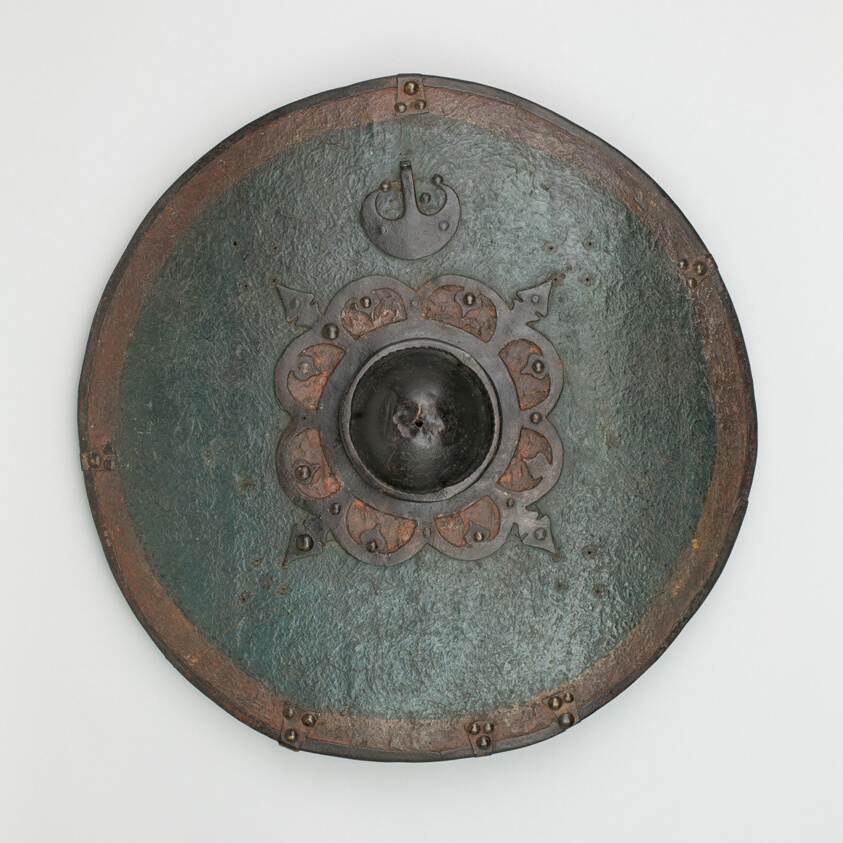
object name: Armor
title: Fencing Buckler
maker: Italian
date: possibly 19th century in 16th century Italian style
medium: Wood, leather, paint, iron, and brass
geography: Italy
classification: shield; armor; arms and armor